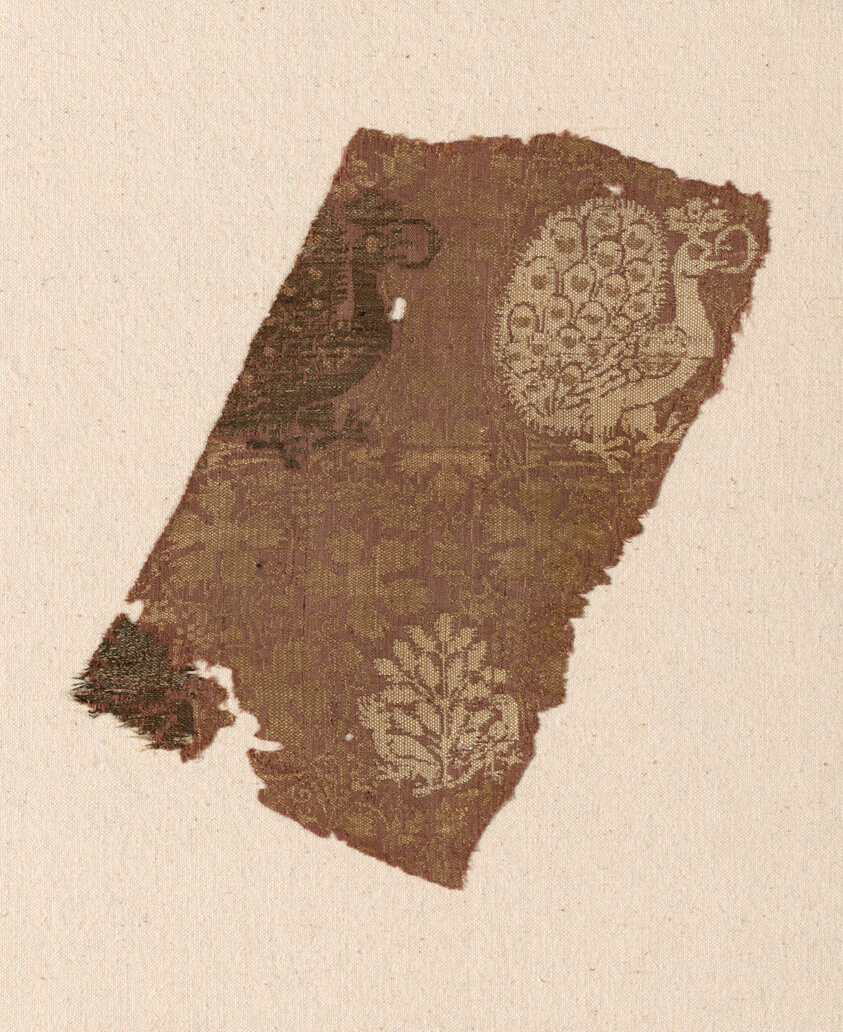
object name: Textile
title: Fragment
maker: Italy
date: 14th century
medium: Silk and gilt-animal-substrate-wrapped linen, plain weave with supplementary patterning and brocading wefts bound by secondary binding warps in plain interlacings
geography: Italy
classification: textile; weaving